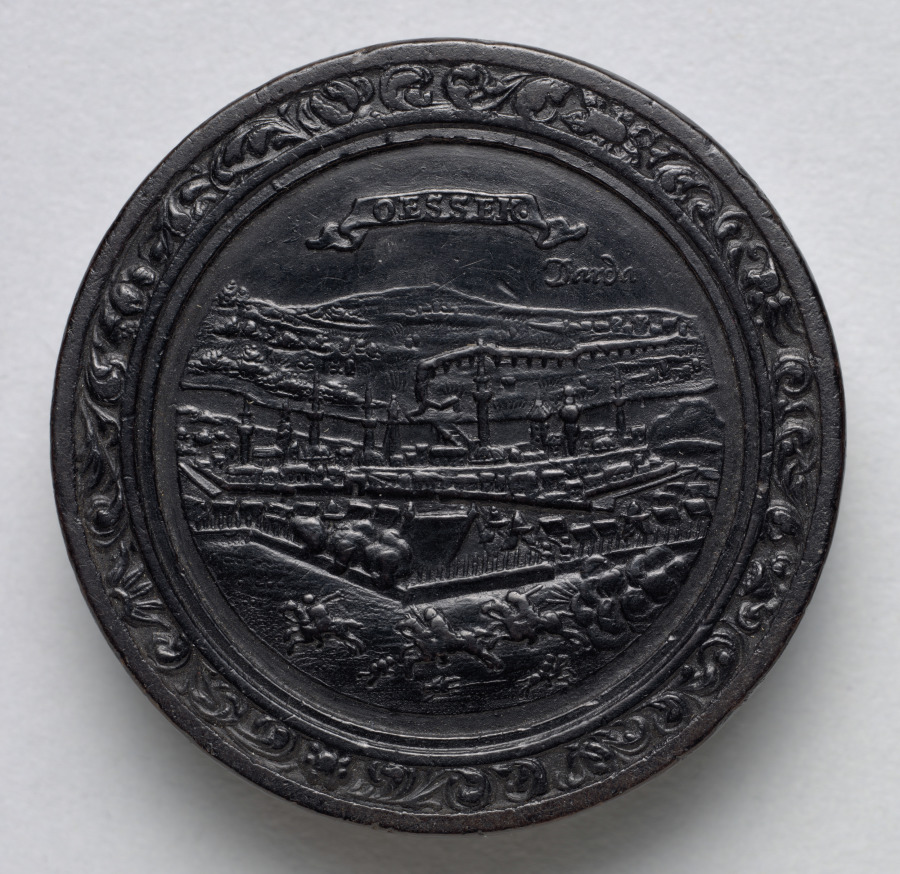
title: Gaming Piece (obverse)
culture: Germany, late 17th-early 18th Century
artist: Martin Brunner (German, 1659–1725)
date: c.1700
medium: wood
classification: Furniture and woodwork